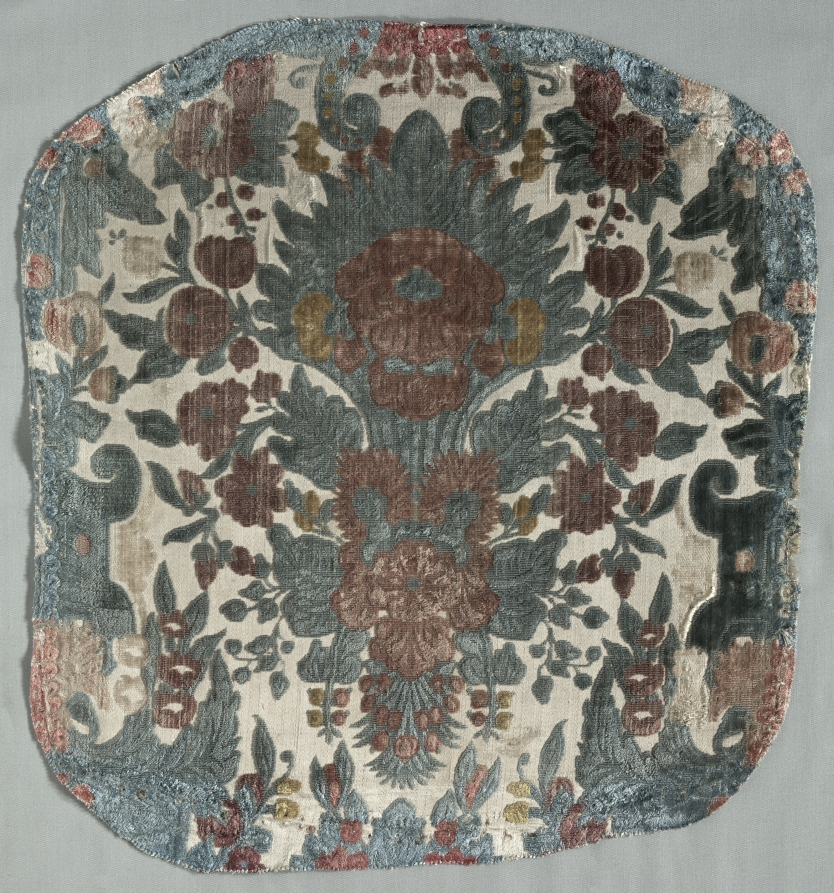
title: Velvet Fragment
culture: Italy, late 17th century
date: late 1600s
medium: velvet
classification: Velvet